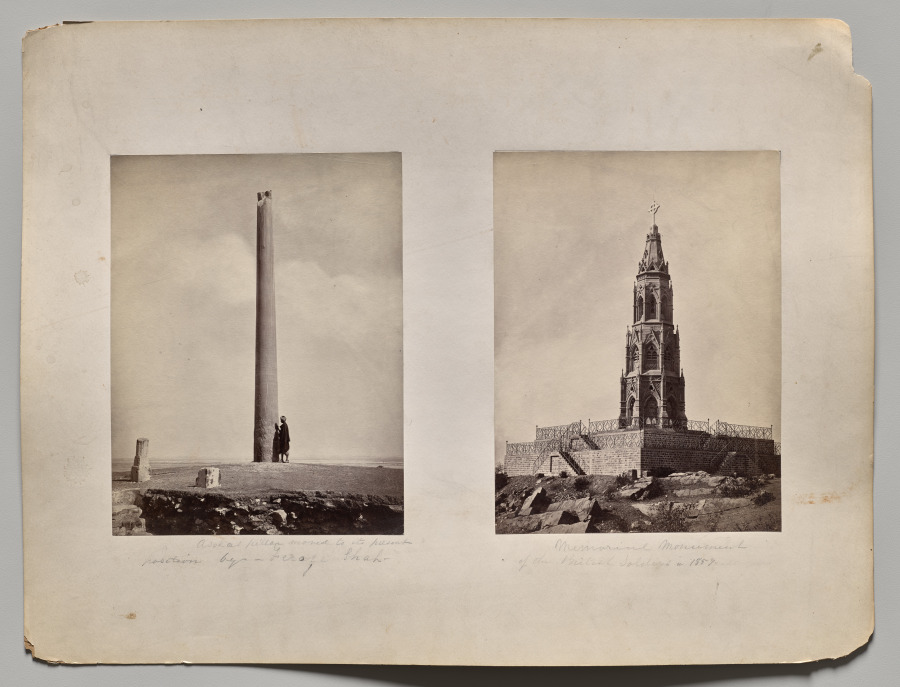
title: Ashoka Pillar moved to its present position by Feroz Shah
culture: England, 19th century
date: 1870s-1880s (?)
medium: albumen print mounted on an album page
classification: Photograph